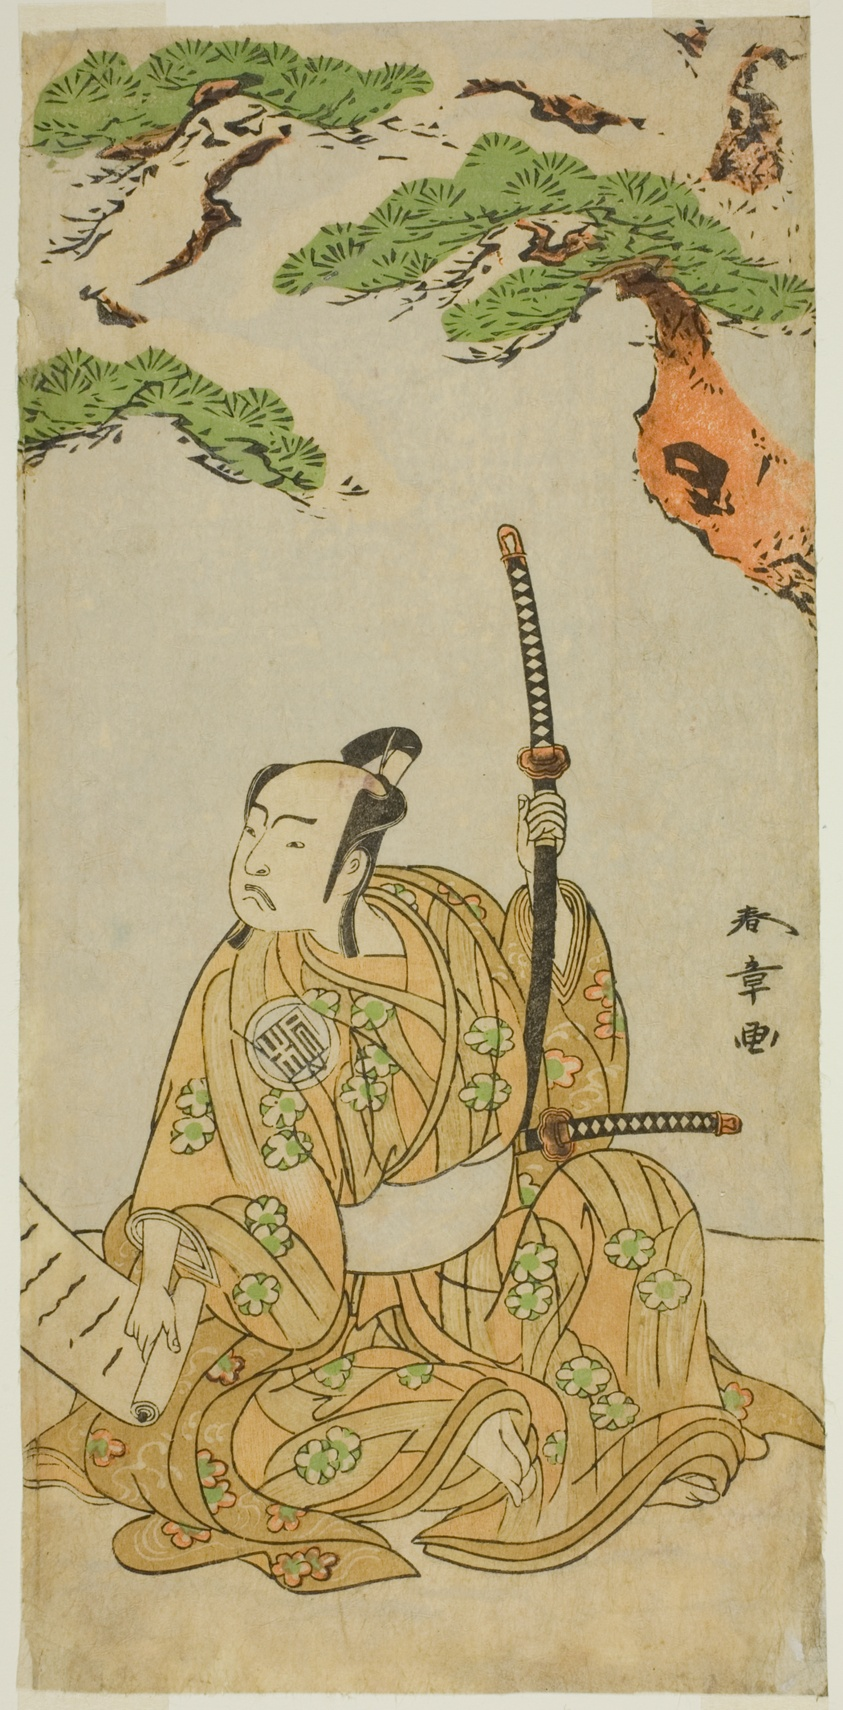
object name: Print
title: The Actor Arashi Sangoro II as Sakura-maru in the Play Sugawara Denju Tenarai Kagami, Performed at the Ichimura Theater in the First Month, 1772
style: Japanese (culture or style)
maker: Katsukawa Shunsho 勝川 春章; Japanese, 1726-1792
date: c. 1772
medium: Color woodblock print; hosoban; right sheet of a multisheet print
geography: Japan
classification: woodblock print; print; asian art